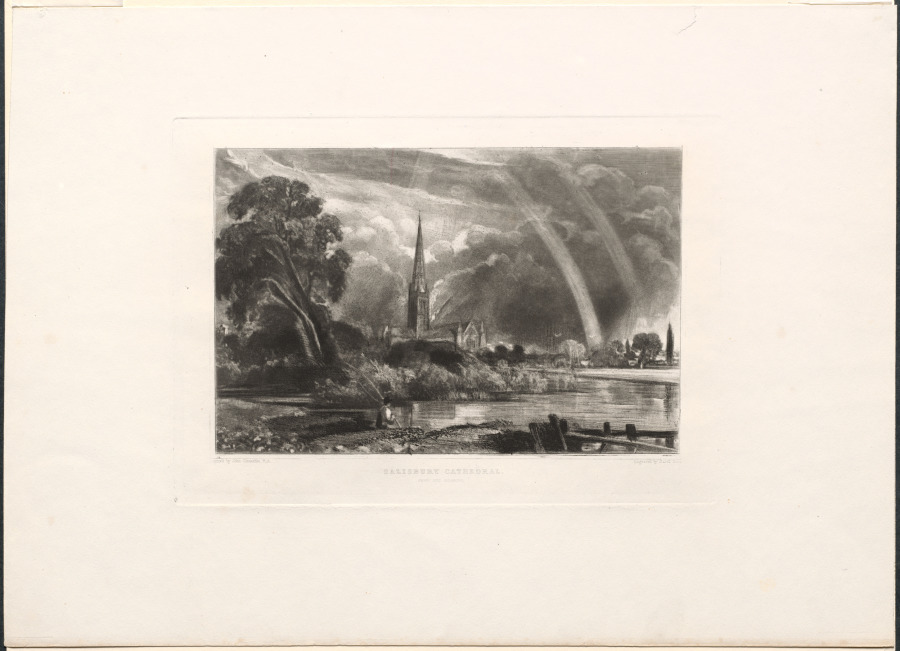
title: Salisbury Cathedral from the Meadows (Small Plate)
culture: England, 19th century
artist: David Lucas (British, 1802–1881)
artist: after John Constable (British, 1776–1837)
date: 1855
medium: etching and roulette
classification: Print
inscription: Lower left: Painted by John Constable, R.A.; below image: SALISBURY CATHEDRAL. / FROM THE MEADOWS.; lower right: Engraved by David Lucas